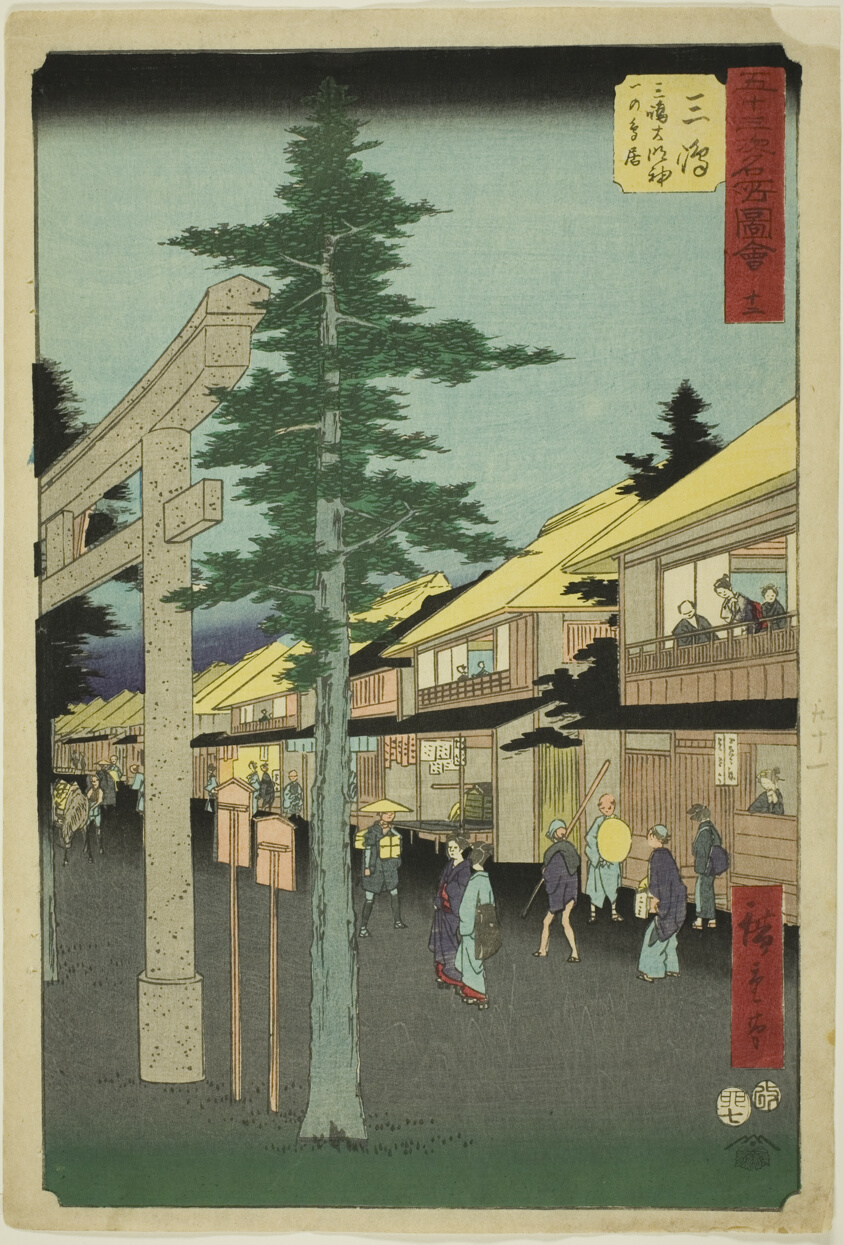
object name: Print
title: Mishima: The First Gate of the Mishima Daimyojin Shrine, no. 12 from the series "Famous Sight of the Fifty-three Stations (Gojusan tsugi meisho zue)," also known as the Vertical Tokaido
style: Japanese (culture or style)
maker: Utagawa Hiroshige 歌川 広重; Japanese, 1797-1858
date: 1855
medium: Color woodblock print; oban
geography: Japan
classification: print; asian art